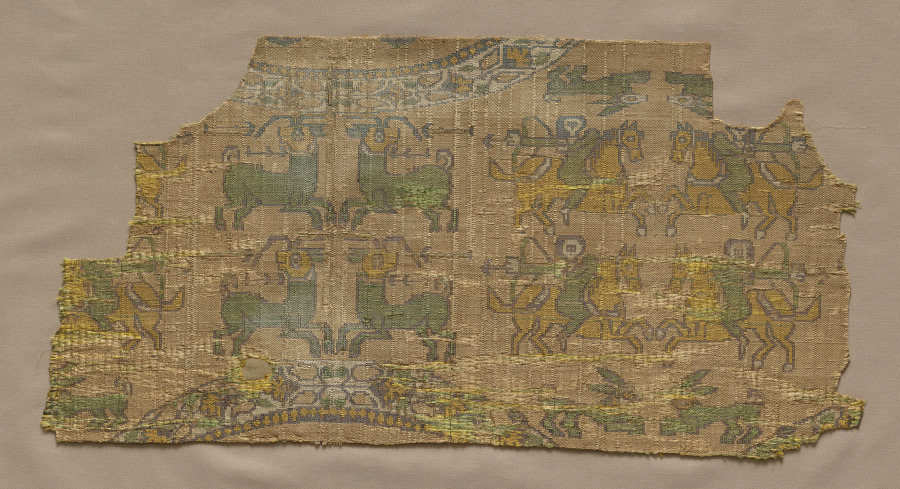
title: Samite fragment with hunters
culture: Eastern Iran or Central Asia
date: 800s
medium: Silk: compound twill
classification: Textile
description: This silk depicts pairs of horsemen hunting ibexes (mountain goats). The ibexes and two pairs of rabbits originally filled the spaces between rows of large floral roundels. Portions of the roundels are preserved at the top and bottom. Although the design was greatly influenced by silks from Egypt and Syria, the abstract style is typically Sogdian, from an area in Central Asia. This is one of many Sogdian silks that were traded to Europe and eventually preserved in church treasuries.